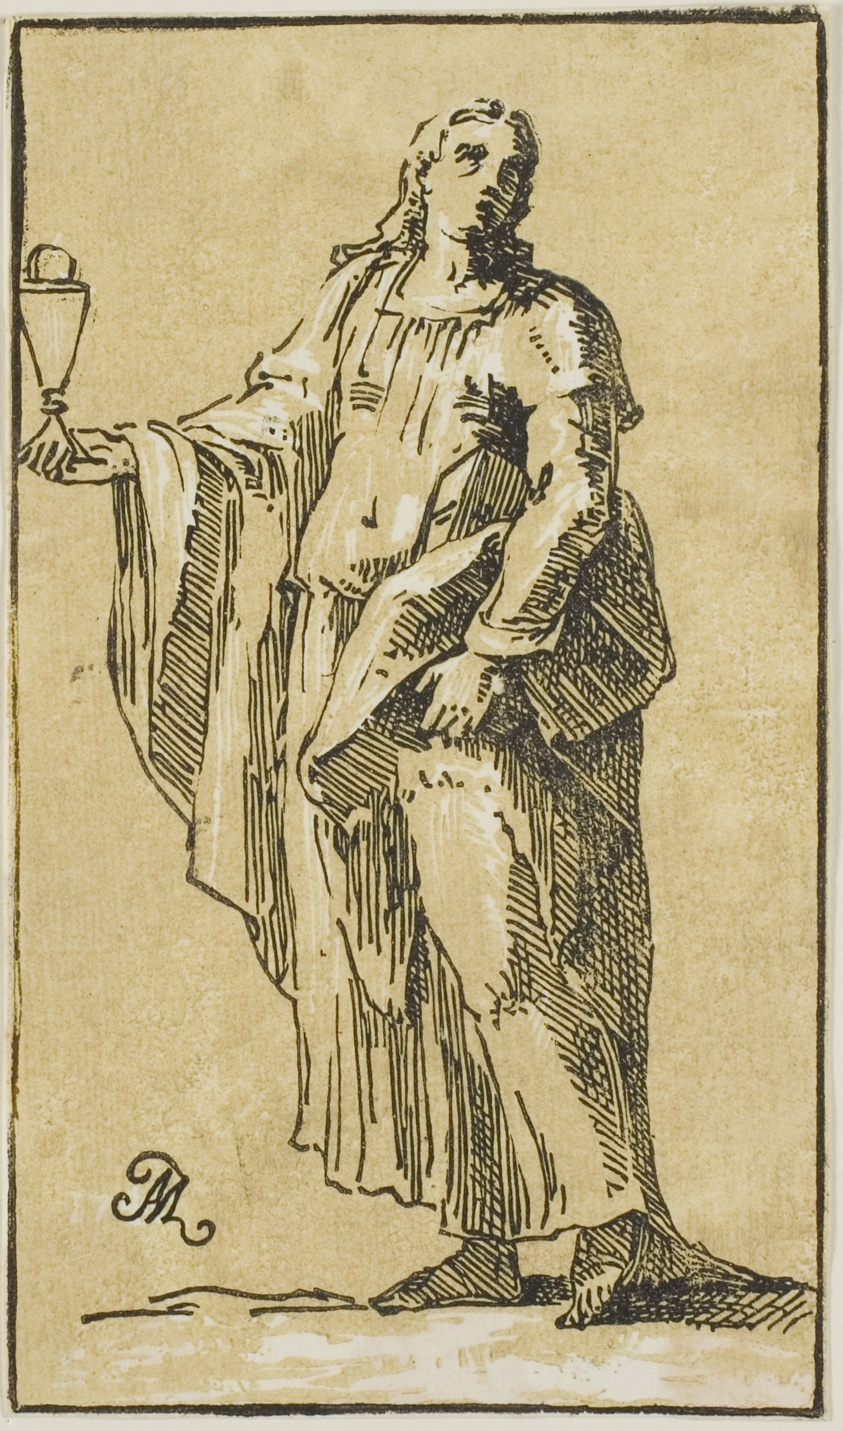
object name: Print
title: St. John the Evangelist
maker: Conte Anton Maria Zanetti; Italian, 1680–1767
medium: Chiaroscuro woodcut in tan and black on off-white laid paper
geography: Italy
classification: woodcut; print; prints and drawing